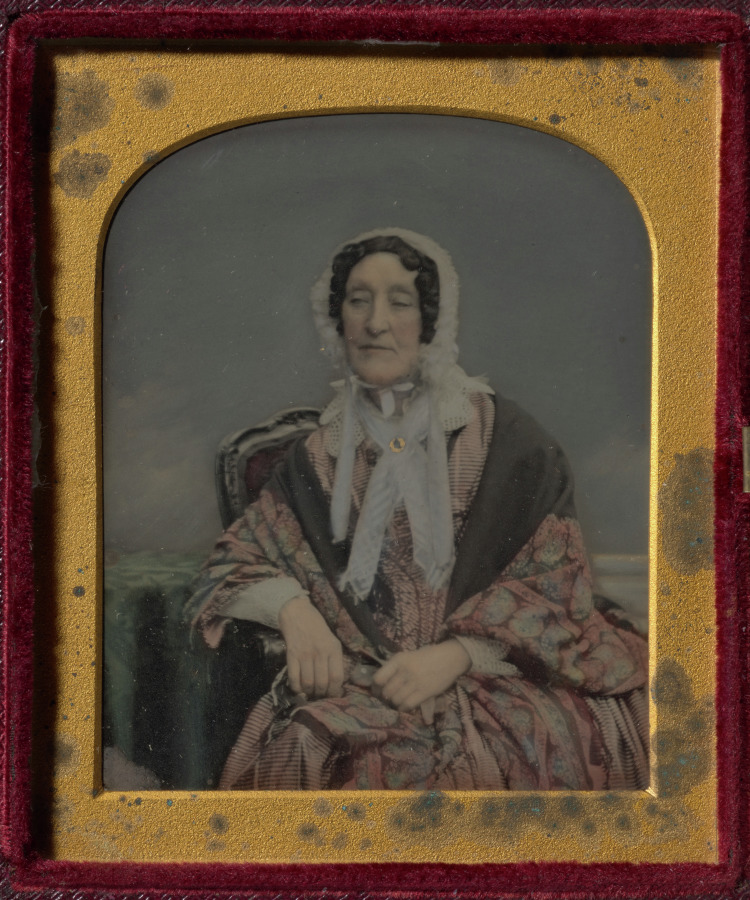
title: High-born lady in white bonnet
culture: France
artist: Antoine Claudet (French, 1797–1867)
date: c. 1855–58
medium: daguerreotype, tinted, sixth plate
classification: Photograph